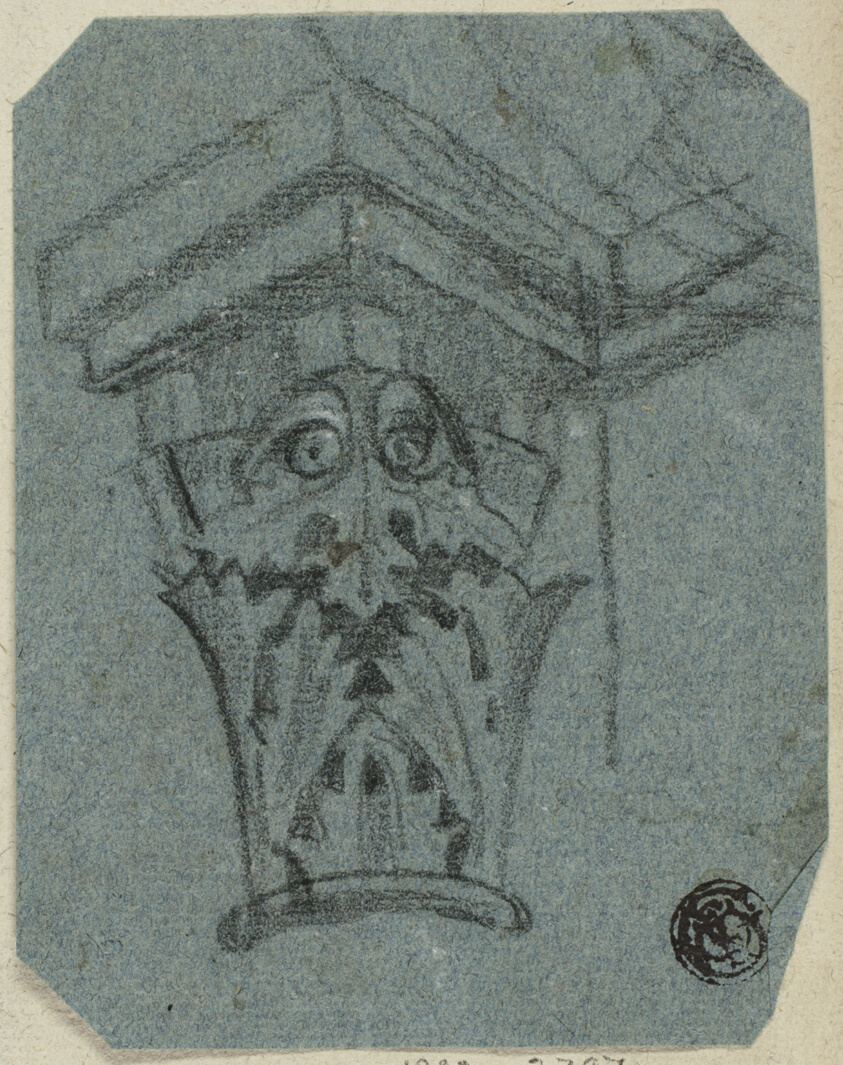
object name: Drawing and Watercolor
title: Capital of Column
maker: Unknown Artist; British, 19th century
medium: Black chalk, heightened with traces of white chalk, on blue laid paper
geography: United Kingdom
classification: chalk; paper; drawings (visual works); prints and drawing